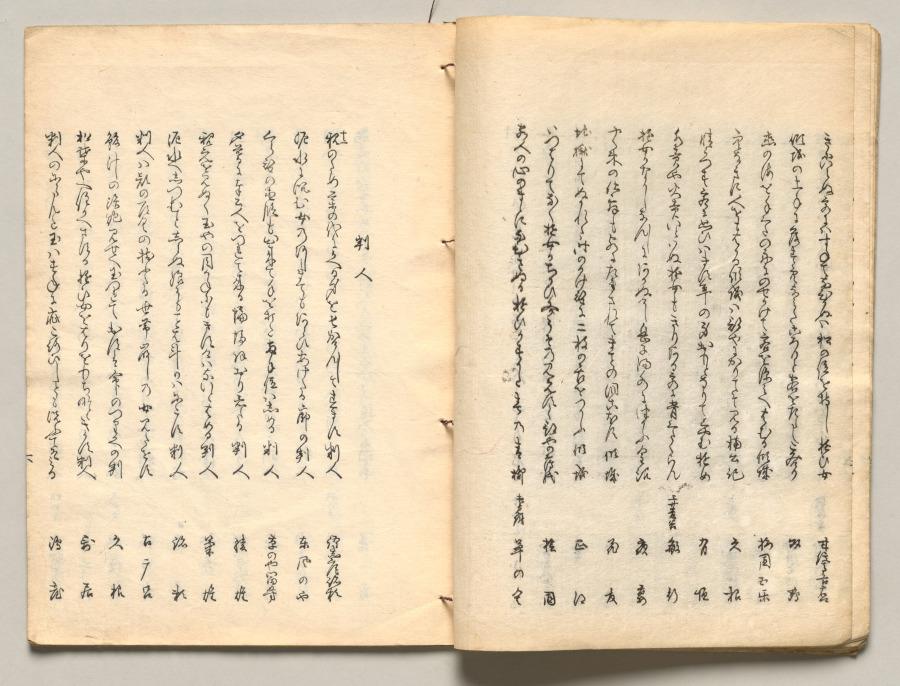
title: Spread Fourteen from Volume Four of People of Japan in Light Verse (Kyōka)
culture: Japan, Edo period (1615–1868)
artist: Utagawa Hiroshige (Japanese, 1797–1858)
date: 1857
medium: Woodblock-printed book; ink and color on paper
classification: Bound Volume